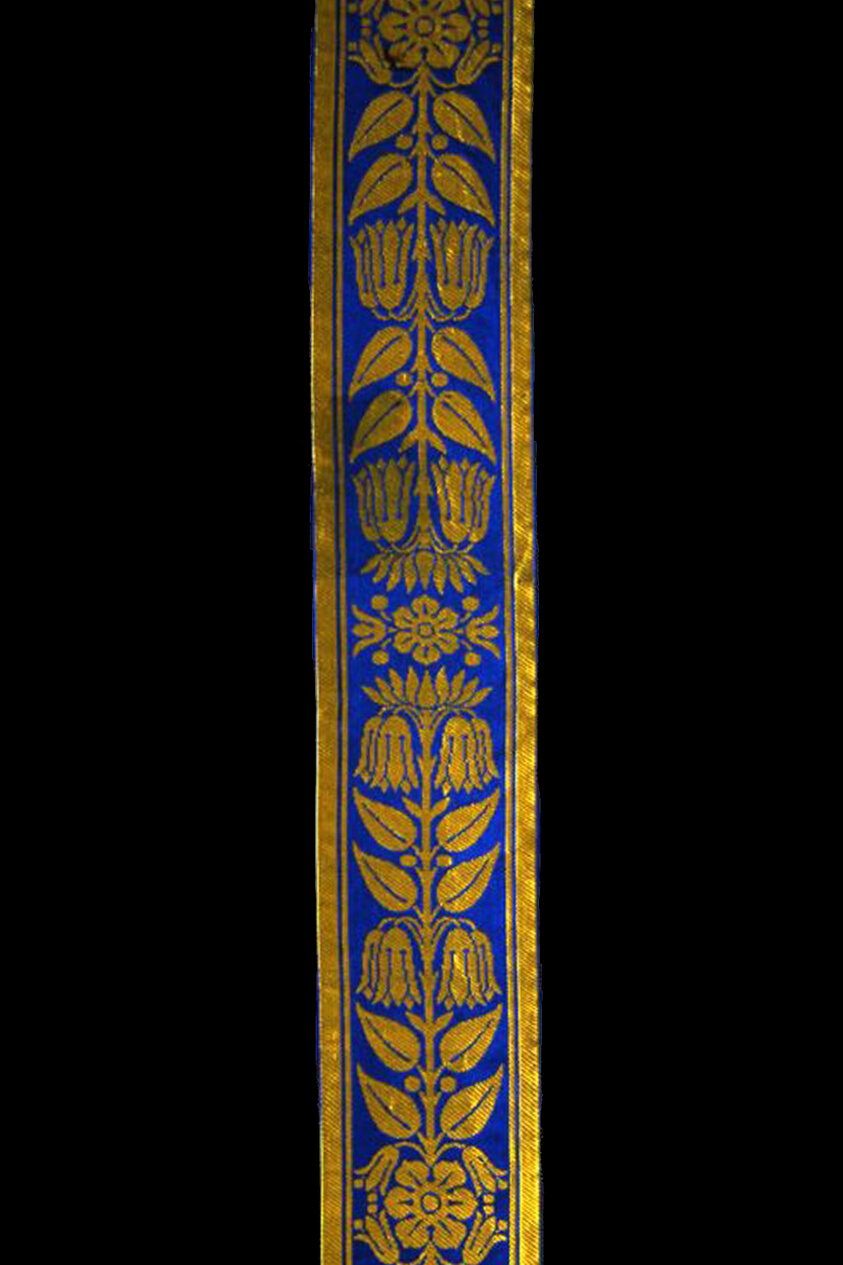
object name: Textile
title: Border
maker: France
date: Early 19th century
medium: Silk, warp-float faced 4:1 satin weave with weft-float faced 3:1 twill interlacings of secondary binding warps and supplementary patterning wefts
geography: France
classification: textile; weaving